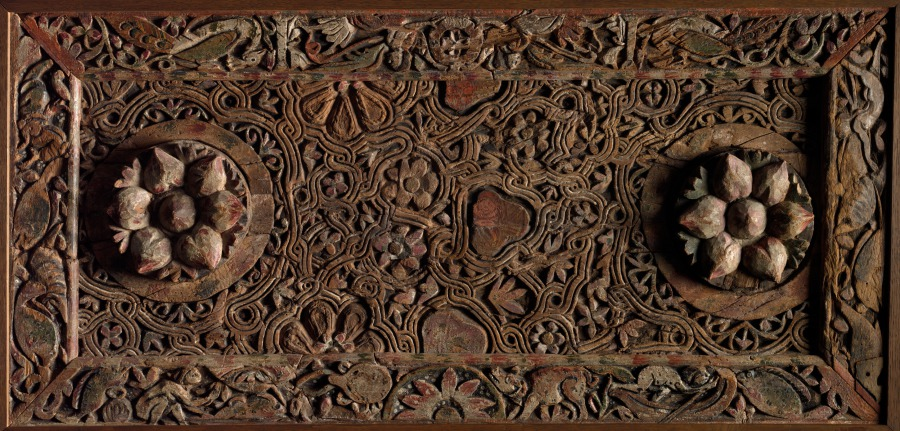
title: Ornamental Panel (from a Ceiling?)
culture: Egypt, Coptic period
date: 500s (frame) and 700s (central panel)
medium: wood with paint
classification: Furniture and woodwork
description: This wooden panel and its frame come from different locations. The four narrow panels forming the outer frame are stylistically datable to the 500s. The large central rectangular panel might date to the 700s. It is most likely a carved ceiling, but its architectural context is unknown. Both panel and frame have been cut down and joined together at some point in their history under unknown circumstances. The decorative program of the main panel features two large rosettes surrounded by florets, leaves, and fruit. The outer frame features two flying angels holding a wreath, a peacock, an octopus, a seated fisherman who holds a long line with a fish attached, and a swimming boy with a dolphin. The vocabulary of the frame is dominated by water life, particularly of the Nile and its banks. Though separated from its original place and altered, this important object provides a welcome glimpse of an architectural interior from early Christian Egypt.